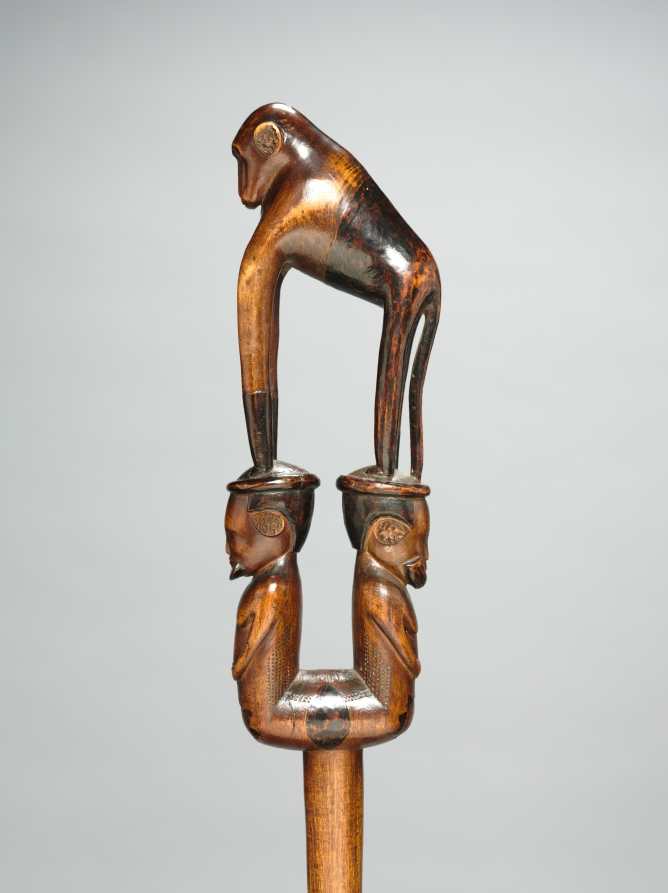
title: Staff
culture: Africa, South Africa, South Africa or Mozambique, probably Tsonga peoples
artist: The Baboon Master (probably Tsonga peoples)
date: 1800s–1900s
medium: Wood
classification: Sculpture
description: Arguably the finest surviving carving of the Baboon Master in a Western collection, this staff features exceptionally sophisticated articulation and detailing. The circular pokerwork motif on one side—which echoes the treatment of the ears on the male heads supporting the baboon—may represent a shield or a leaf. The heads feature the characteristic ornament that signifies maturity and marriage; covered with a mixture of gum, charcoal, and oil, this hairdo, called isicoco, employed a fiber or sinew ring into which the wearer’s hair was woven.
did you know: Artists working on the African continent often moved from place to place; the artist nicknamed The Baboon Master was of the Tsonga culture and worked in the Zulu kingdom.